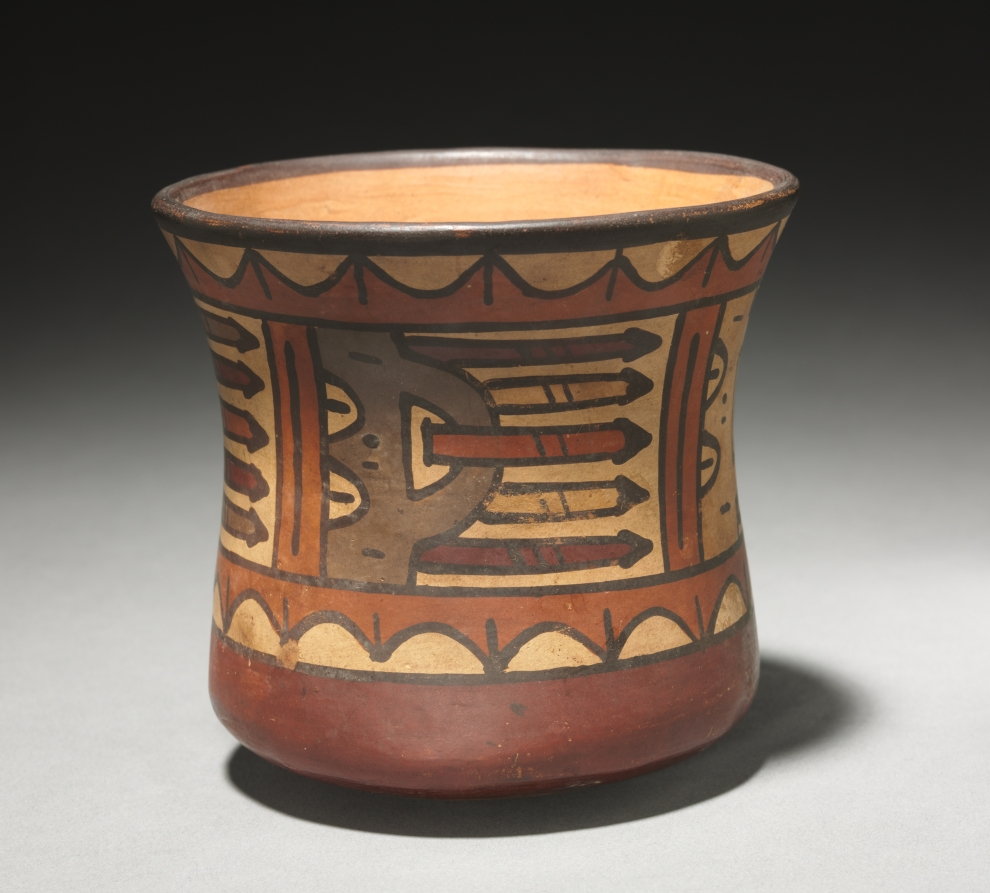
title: Bowl with Trophy Heads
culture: Peru, Nasca, Early Intermediate Period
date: c. 100–650 CE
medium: ceramic, slip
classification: Ceramic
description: Nasca is one of the two major cultures and ceramic styles of its periods, and one of the finest ceramic styles ever produced in the South American Andes. Vessel walls are thin, firing temperatures higher than in earlier times, and a variety of warm, earthen-toned slips come into use. This small bowl features repetitions of human trophy heads—a major Nasca motif that refers both to war and fertility.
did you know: Two important themes in Nasca art are war and fertility.